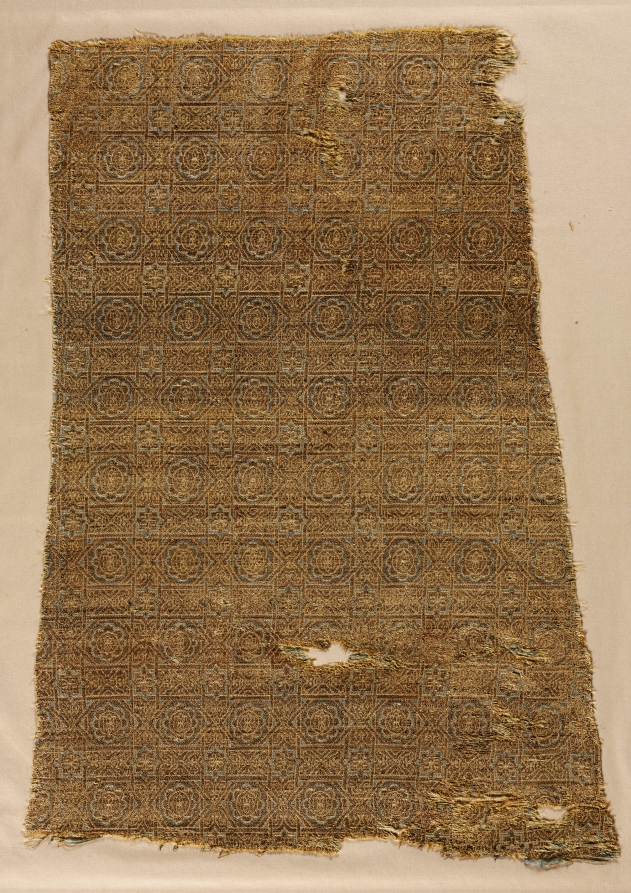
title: Fragment with star and cross design from the tomb of Don Felipe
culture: Spain, probably Almeria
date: 1200–1274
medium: taqueté: silk and gold thread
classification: Textile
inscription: "Al-yamen" (Success).